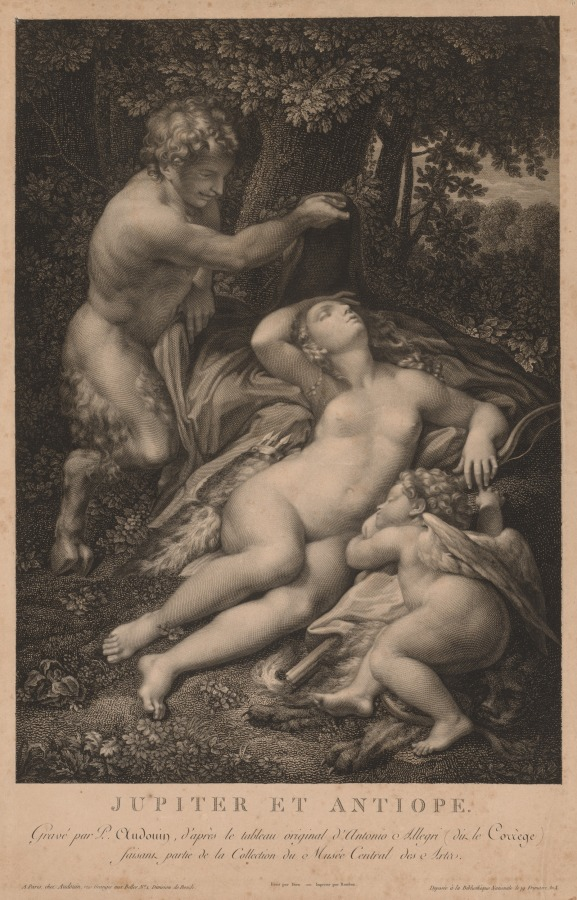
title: Jupiter and Antiope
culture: France, 18th-19th century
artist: Pierre Audouin (French, 1768–1822)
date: c. 1801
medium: etching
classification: Print